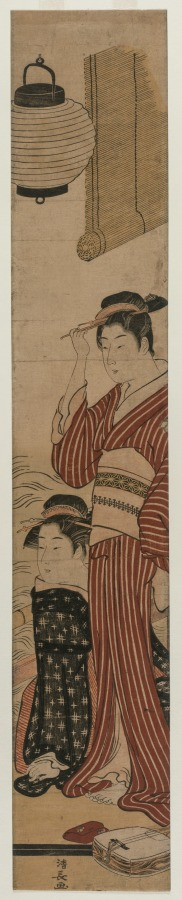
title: Two Geisha on a Balcony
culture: Japan, Edo period (1615–1868)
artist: Torii Kiyonaga (Japanese, 1752–1815)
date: 1782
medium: color woodblock print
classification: Print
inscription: Signature: Kiyonaga ga